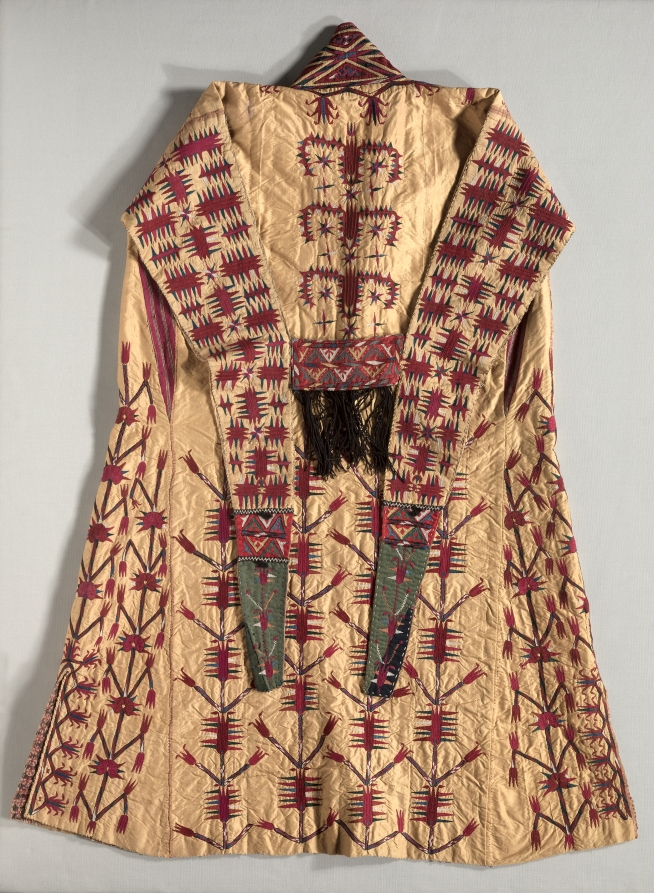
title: Woman's cloak (chyrpy)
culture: Uzbekistan, Bukhara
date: 1800s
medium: Cotton; silk: embroidery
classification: Garment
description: This yellow silk is richly embroidered in the button-hole stitch. The pattern of this woman's cloak resembles one of the patterns on the so-called Bokhara stripes used for fixing tents. The garment is lined with printed cotton fabric, which seems to be a product of India or Persia, and very crude block-printed cotton fabric with simple allover patterns of red and black dots and circular medallions.